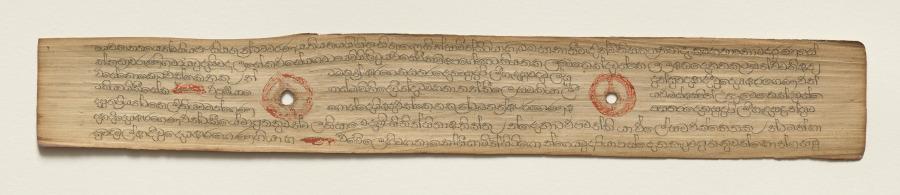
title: Leaf from a Buddhist Manuscript (verso)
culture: Sri Lanka, Singhalese, Late 17th century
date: c. 1700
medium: fiber paper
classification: Manuscript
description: Palm leaf material is still used for manuscripts in Sri Lanka. The palm leaves are prepared first by boiling them, drying them in the sun, and then rubbing them with oils. Scribes then use a metal stylus to incise the text. Then charcoal powder is wiped across the pages, filling in only the inscribed lines.